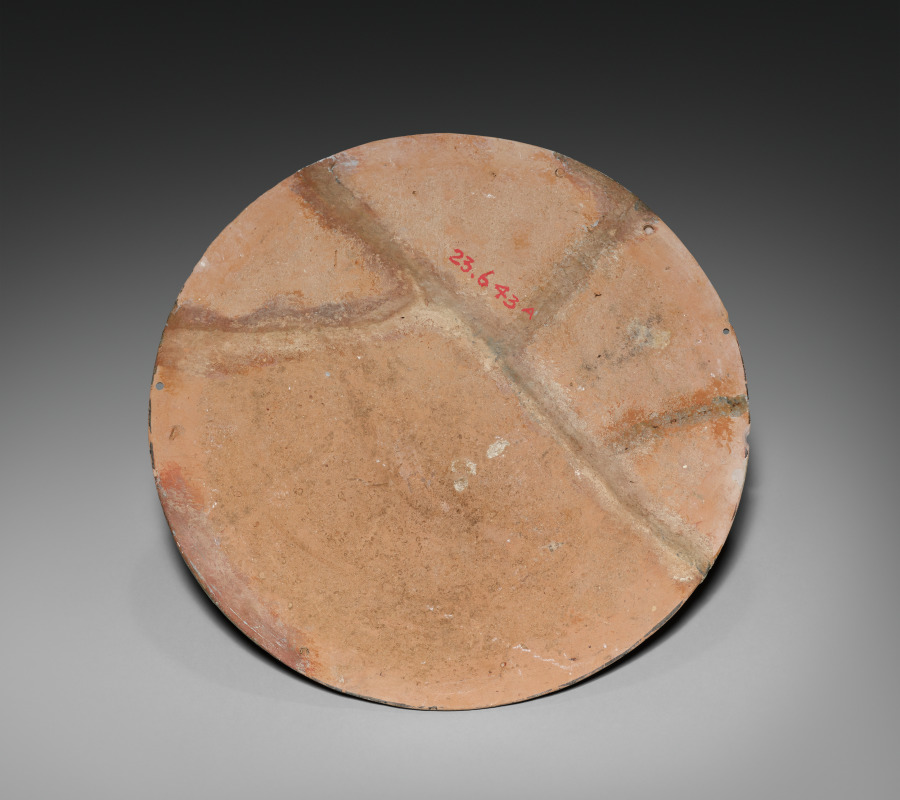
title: Geometric Horse Pyxis (Cylindrical Lid)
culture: Greek, Attic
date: c. 760–750 BCE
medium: ceramic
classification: Ceramic